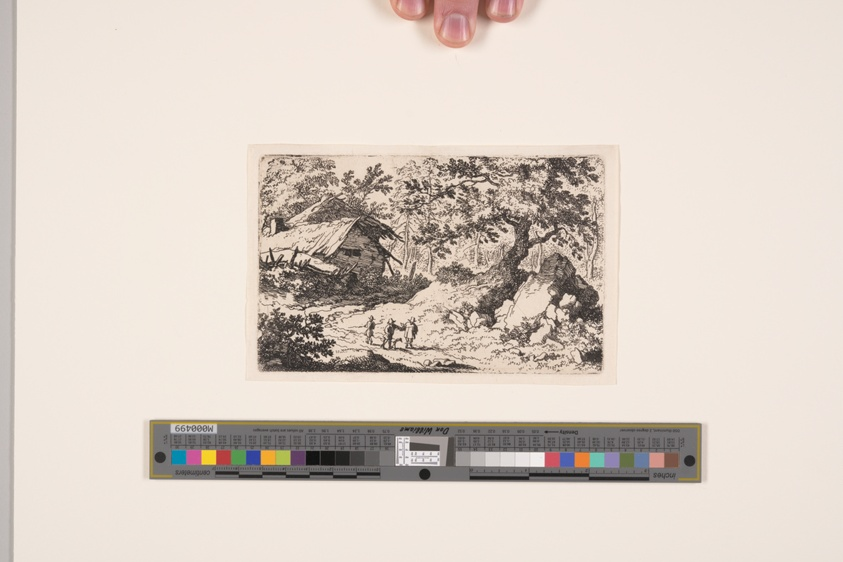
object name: Print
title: The Ruinous Cottage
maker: Allaert van Everdingen (Dutch, 1621–1675)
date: 1631/75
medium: Etching on paper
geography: Netherlands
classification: etching; paper; print; prints and drawing